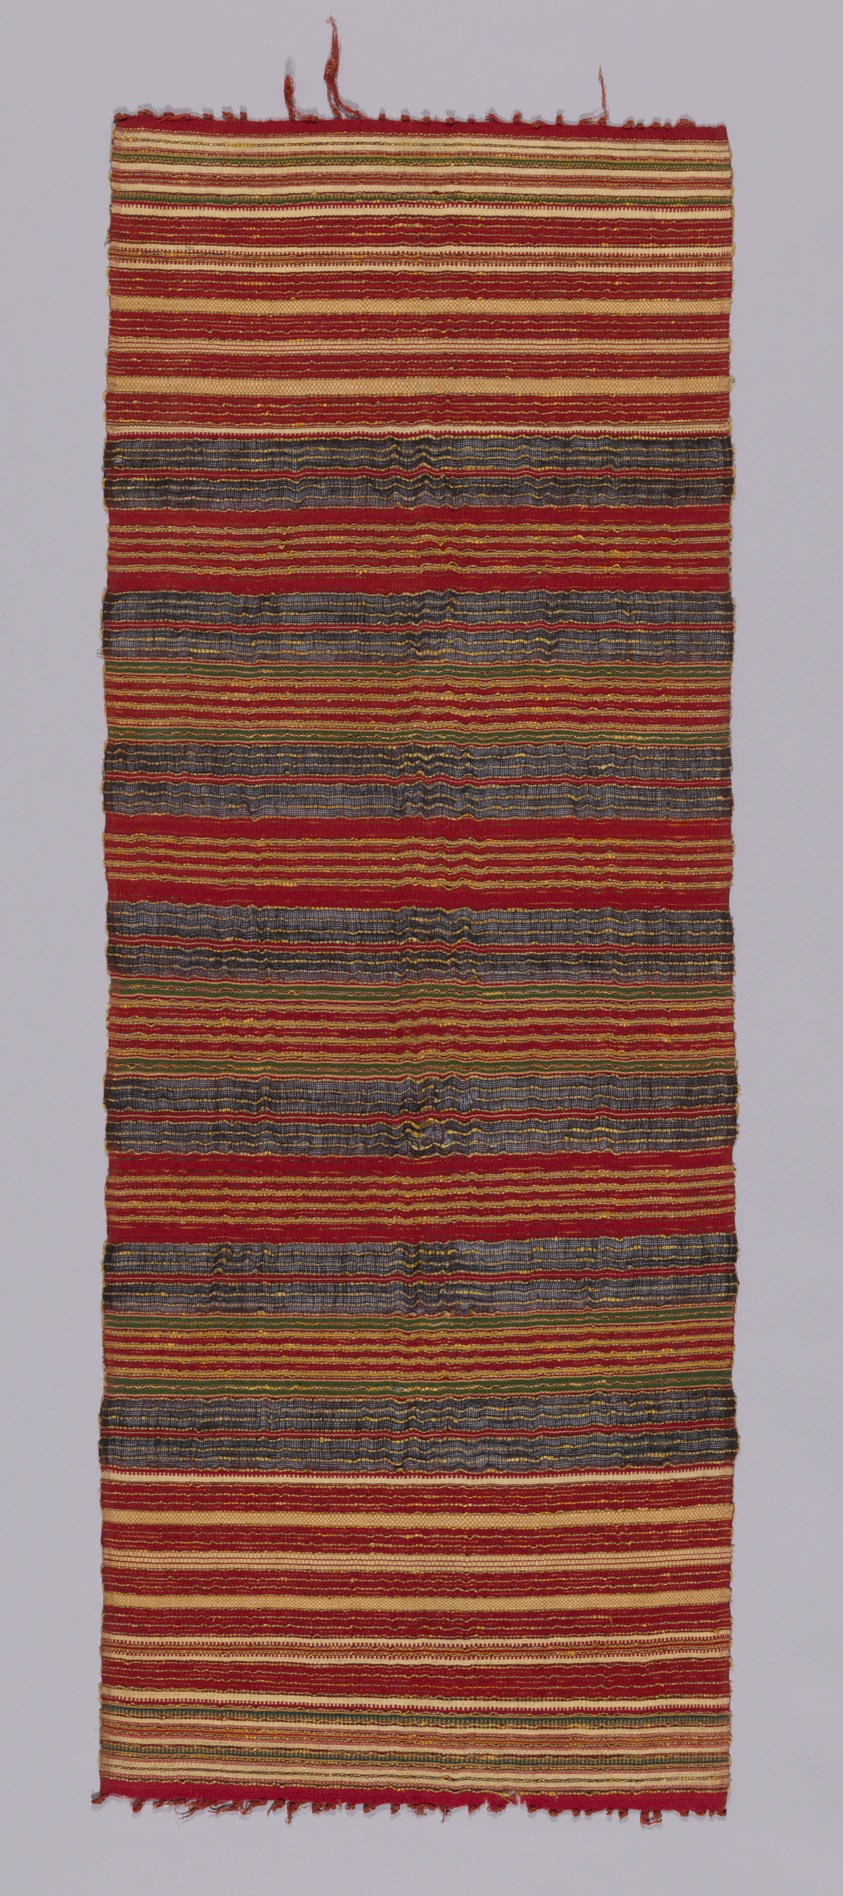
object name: Religious/Ritual Object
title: Cermonial Textile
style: indonesian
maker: Indonesia, Bali, Buleleng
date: 19th century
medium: Cotton, bast fiber (probably ramie), and gold-leaf-on-paper-strip-wrapped bast fiber (probably ramie) bands of plain weave, weft resist dyed (weft ikat) plain weave and weft-faced plain weave; knotted main warp fringe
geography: Bali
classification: textile; weaving; ritual objects